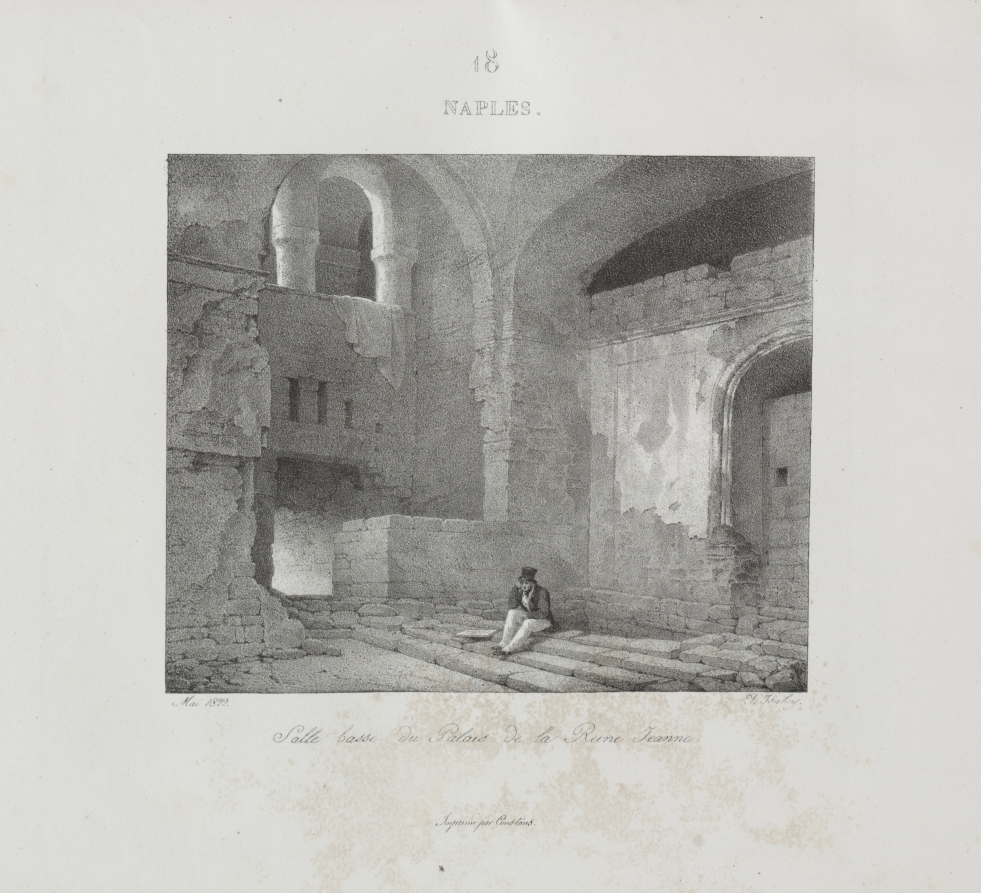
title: Voyage en Italie en 1822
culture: France, 19th century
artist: Jean-Baptiste Isabey (French, 1767–1855)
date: 1833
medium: lithograph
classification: Bound Volume